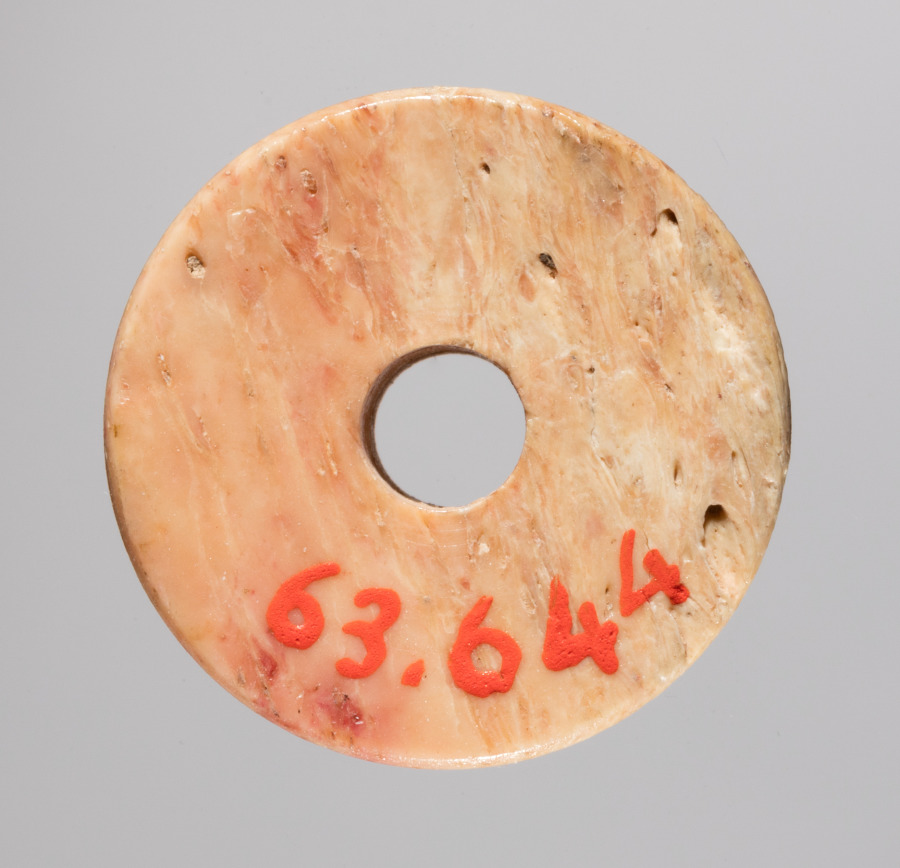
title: Spindle Whorl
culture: Iran, early Islamic period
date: 700s - 900s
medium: bone, incised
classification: Spindle Whorl